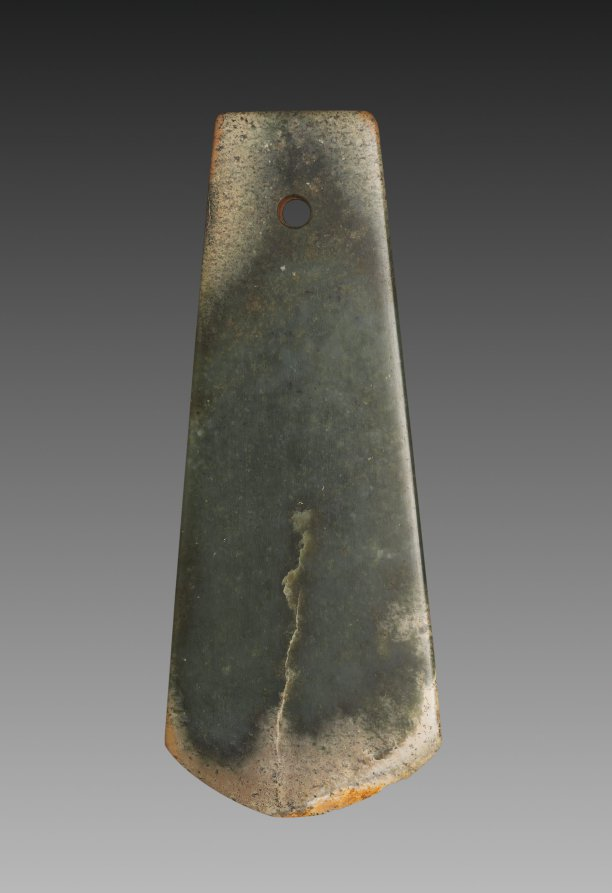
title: Ceremonial Axe (Fu)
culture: China, Erlitou culture (c. 1900–1500 BCE)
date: c. 1900–1500 BCE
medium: jade (nephrite)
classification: Jade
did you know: This ceremonial axe is made of carefully worked jade rather than metal.